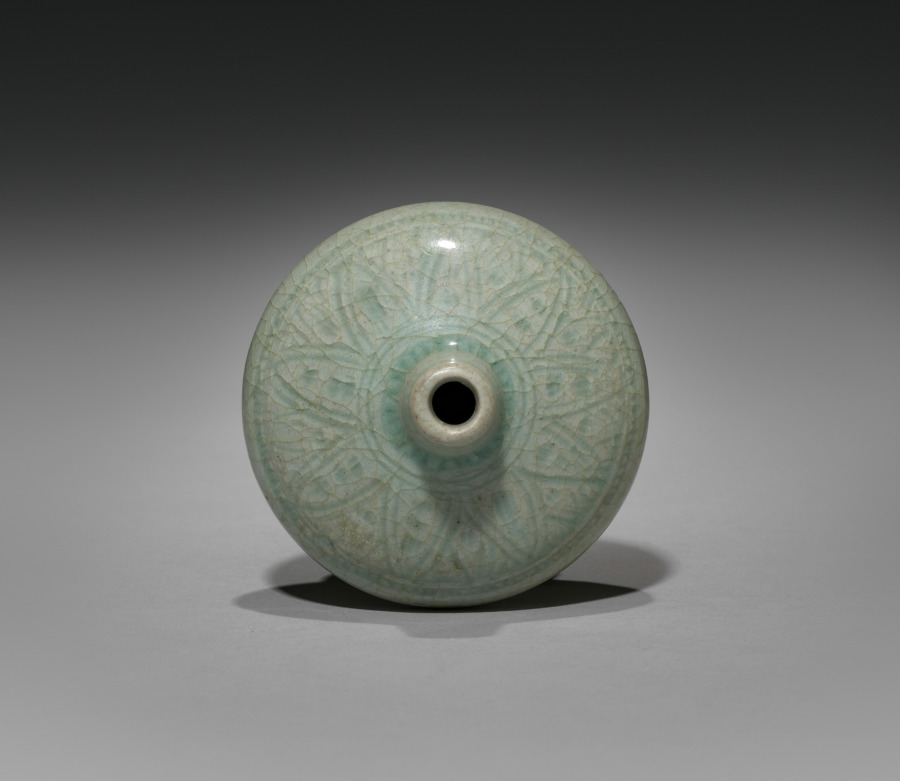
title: Small Jar: Sawankhalok Ware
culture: Thailand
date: 1300s–1400s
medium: porcelain with celadon glaze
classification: Ceramic